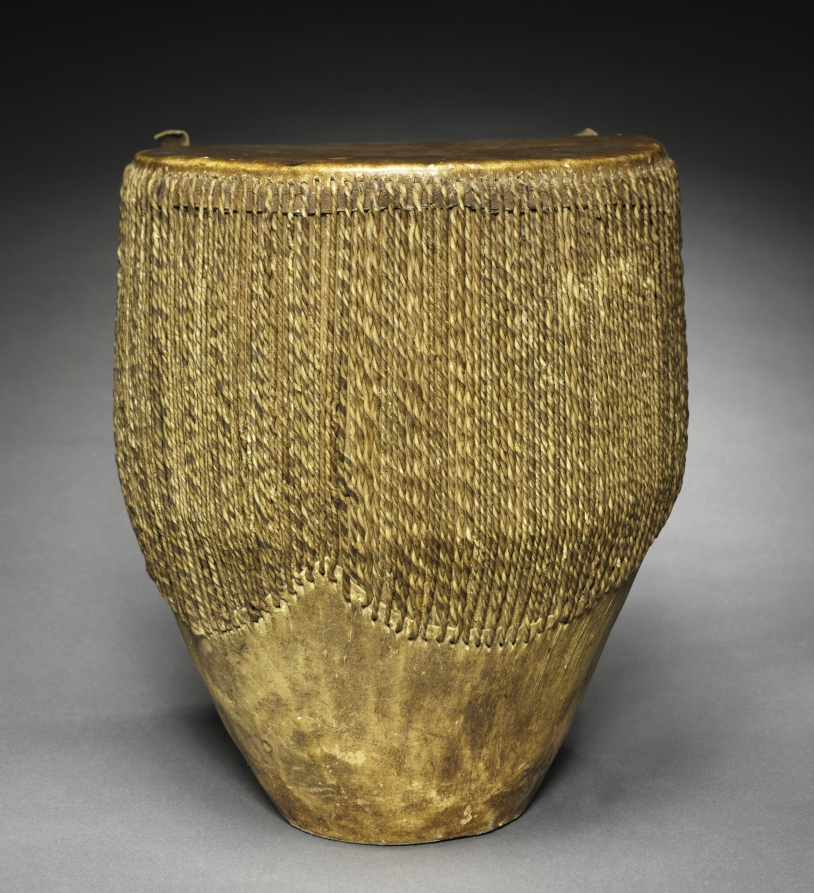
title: Drum (ngoma)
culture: Africa, Eastern Africa, unknown maker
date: by 1928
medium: Wood, rawhide, and plant fiber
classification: Musical Instrument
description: This musical instrument takes its name ngoma from the Kongo language word for "drum." Specialized craftspeople often made these drums. The wooden base is hollow and covered with a first hide, then a second one held tight by plant fibers. This allows the sound to resonate when just the first membrane is struck. In Uganda, drums contain a ritual "heart" known only to its maker, which helps to imbue it with power. In contrast with royal drums (mpango), this instrument is not considered sacred. The sounds from men striking drums could be used as a kind of communication or as music in a performance setting.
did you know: Paul Travis purchased this piece in Kampala, Uganda, shortly after receiving a telegram informing him that the African Art Sponsors and the Gilpin Players had commissioned him to collect African works with money they raised.